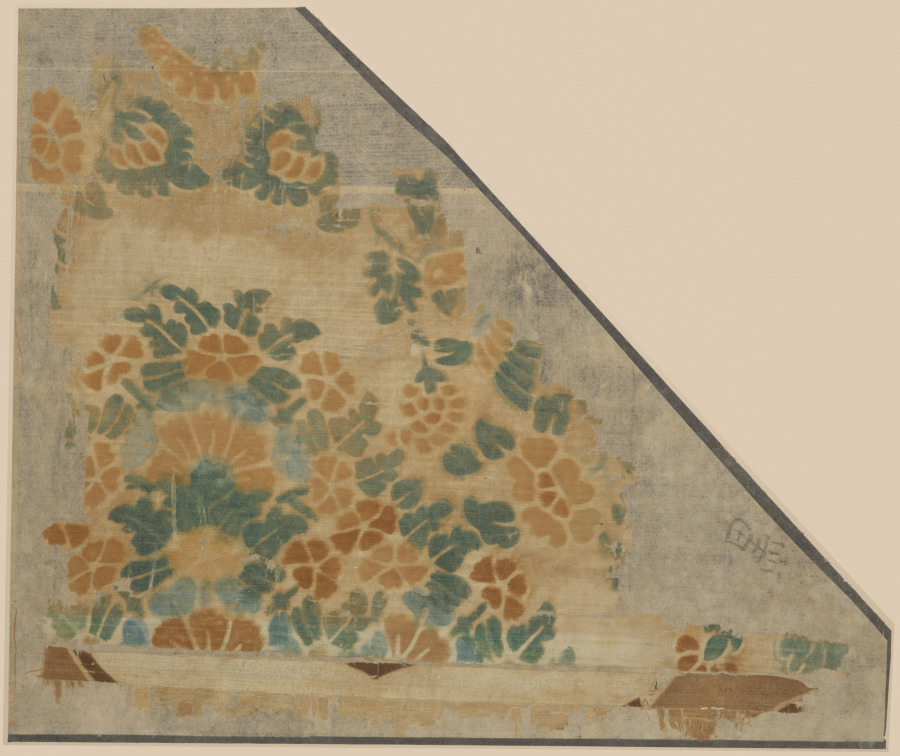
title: Fragment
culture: China or Japan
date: 700s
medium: tabby weave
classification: Textile